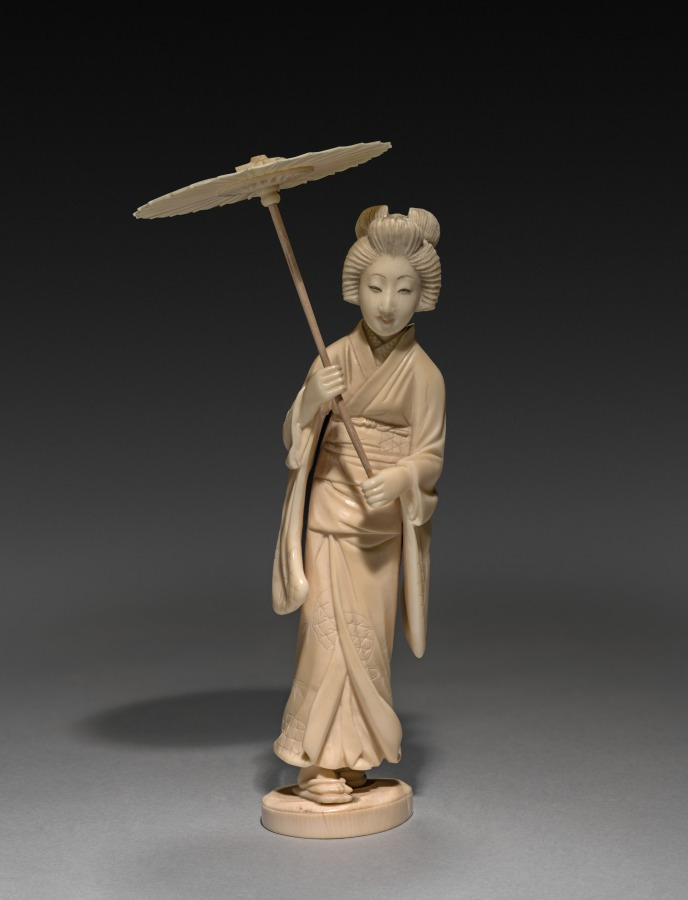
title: Woman Carrying a Parasol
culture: Japan, Meiji period (1868–1912)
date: Late 1800s- Early 1900s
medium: ivory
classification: Ivory